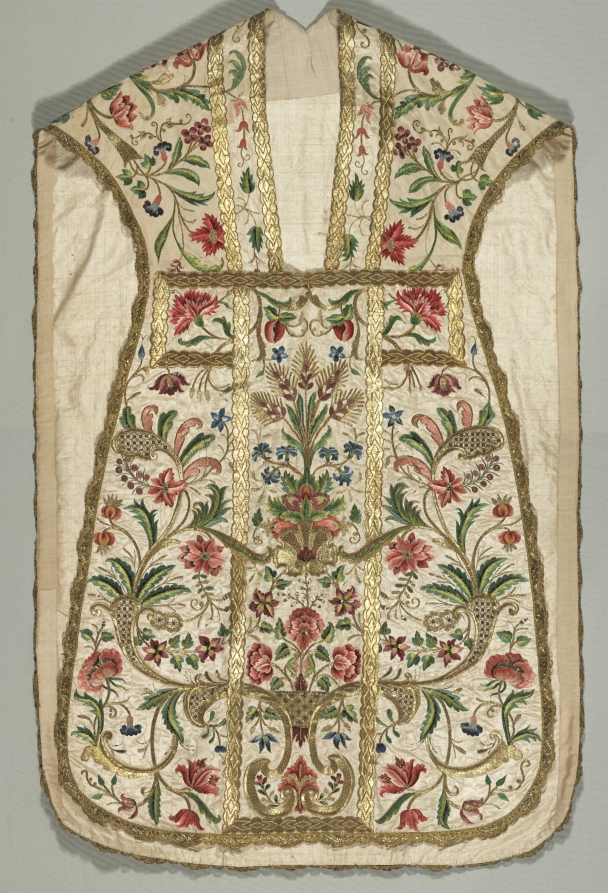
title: Chasuble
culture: Italy, 18th century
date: 1700s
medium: Silk and metallic threads; embroidery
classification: Textile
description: A beautiful design emanates from a vase in the center of this chasuble, displaying symmetrical flora that extend across embroidered gold braids into graceful curvilinear cartouches, reflecting contemporary architectural decoration. Also in the center, sheaves of wheat and grapes represent the bread and wine of the Mass. Gold sequins within thread-outlined squares illustrate fine quality workmanship. The decoration of the stole and chalice veil is similar to the chasuble, also on moiré (watered) silk fabric. The stole, an insignia of the office of deacons and priests, is worn under a chasuble, and the chalice veil—bearing the monogram of Jesus Christ, ihs, in the center—covers the chalice and paten (the plate holding the Eucharistic bread).